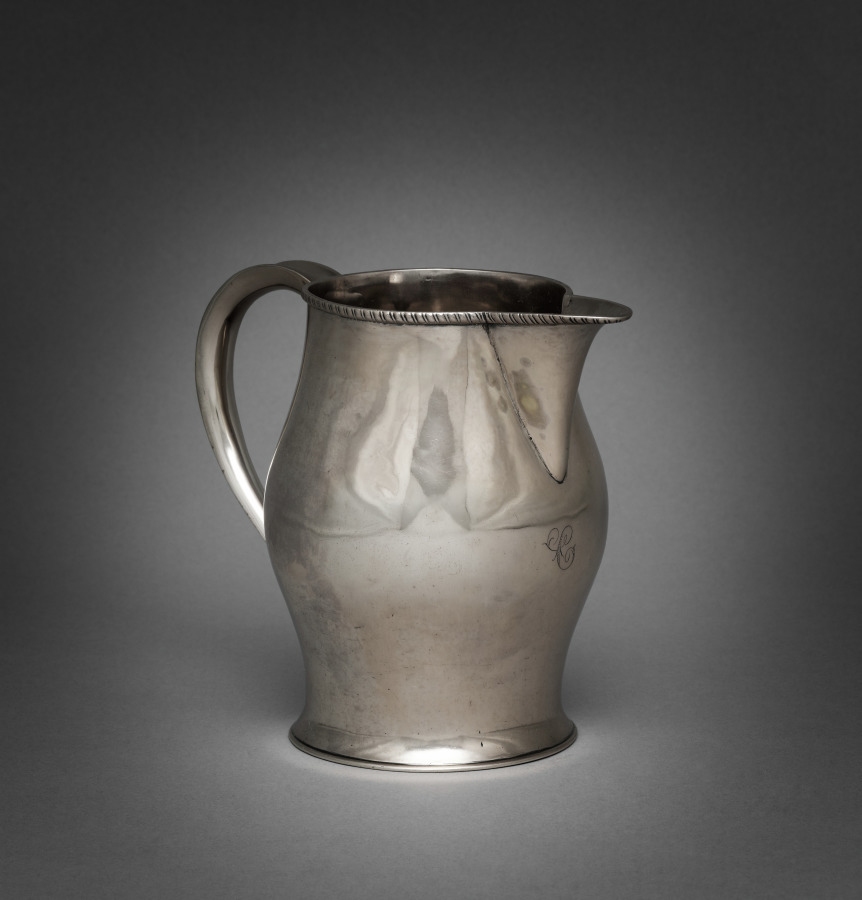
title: Pitcher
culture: America, probably Massachusetts, 19th century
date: 1800–1810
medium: silver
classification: Silver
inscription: Engraved on front side: "C".